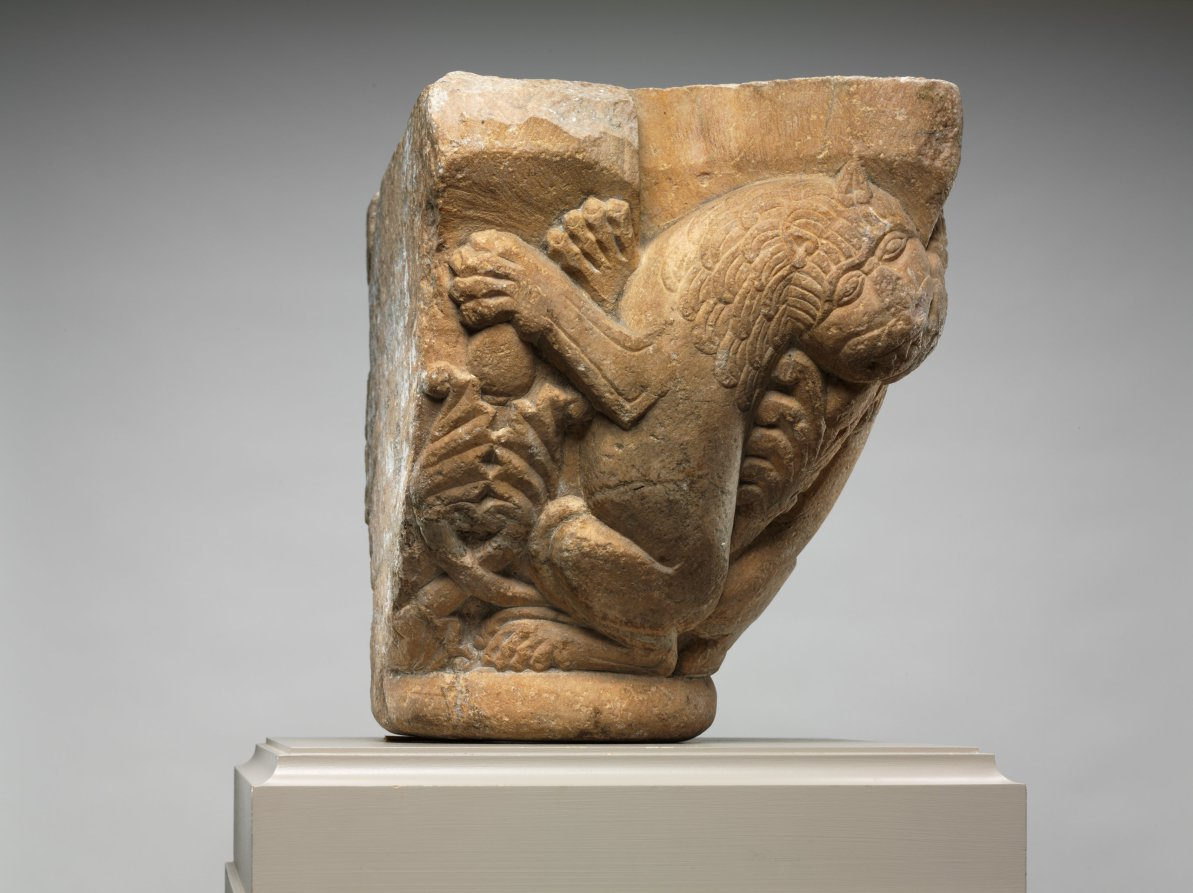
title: Engaged Capital with Lions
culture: Northern Spain (Navarre ?) or Southwest France (Pyrénées or Roussillon ?), mid-12th century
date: 1145–64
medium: marble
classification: Sculpture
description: The compositional motif of confronted and addorsed beasts illustrated on this capital was especially popular in churches along the pilgrimage roads.